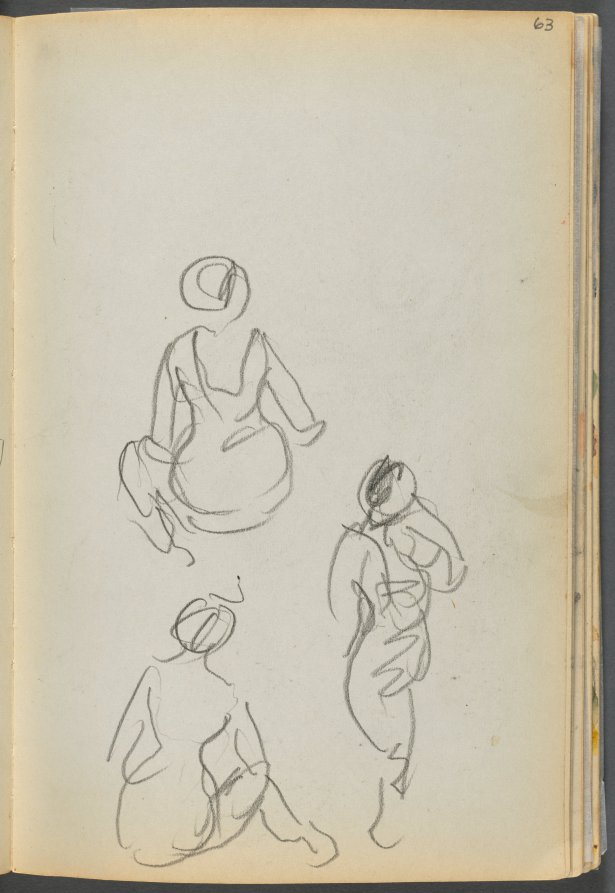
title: Sketchbook- The Granite Shore Hotel, Rockport, page 063: Bathers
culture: America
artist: Maurice Prendergast (American, born Newfoundland [now Canada], 1858–1924)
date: 1905–10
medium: graphite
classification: Bound Volume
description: This sketchbook contains 72 pages of pencil drawings and 9 watercolors of Cape Ann. On the inside of the cover Prendergast wrote the address of the Granite Shore Hotel in Rockport, Massachusetts.